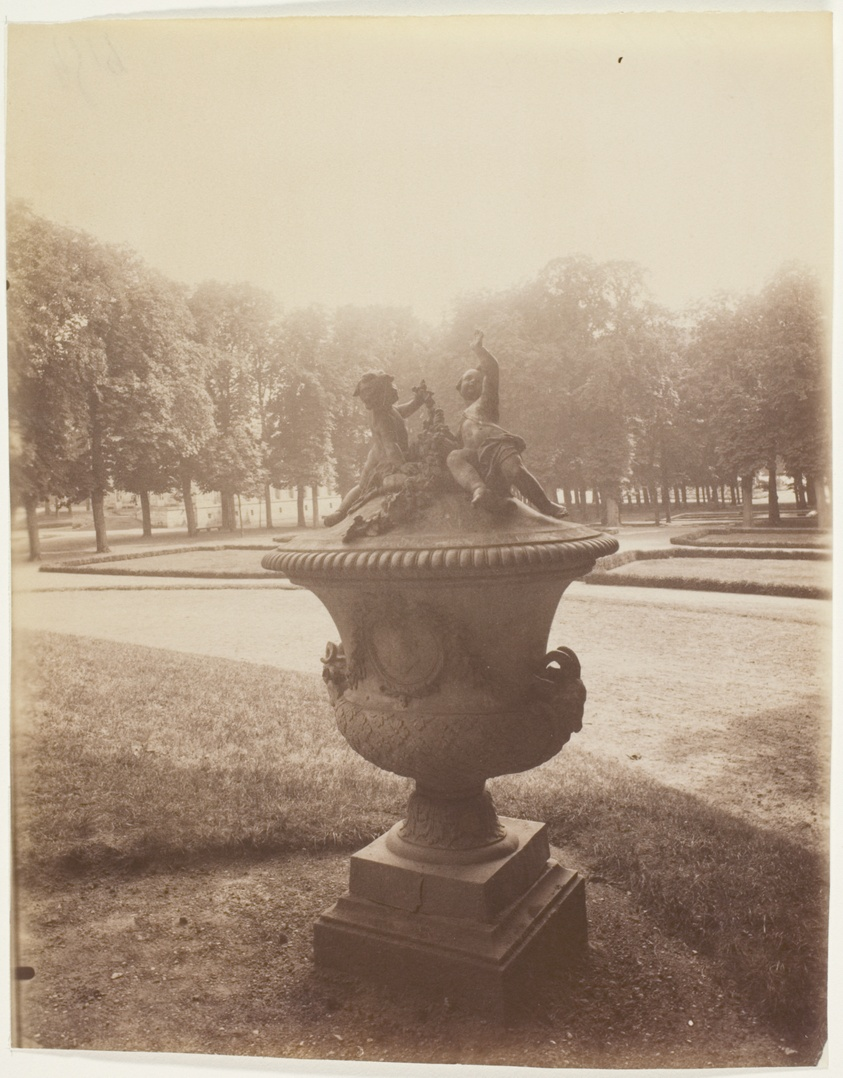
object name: Photograph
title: Versailles, Grand Trianon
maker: Jean-Eugène-Auguste Atget (French, 1857–1927)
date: 1901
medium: Albumen print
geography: France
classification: albumen silver print; photographic process; photography; photograph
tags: Collected by Hugh Edwards